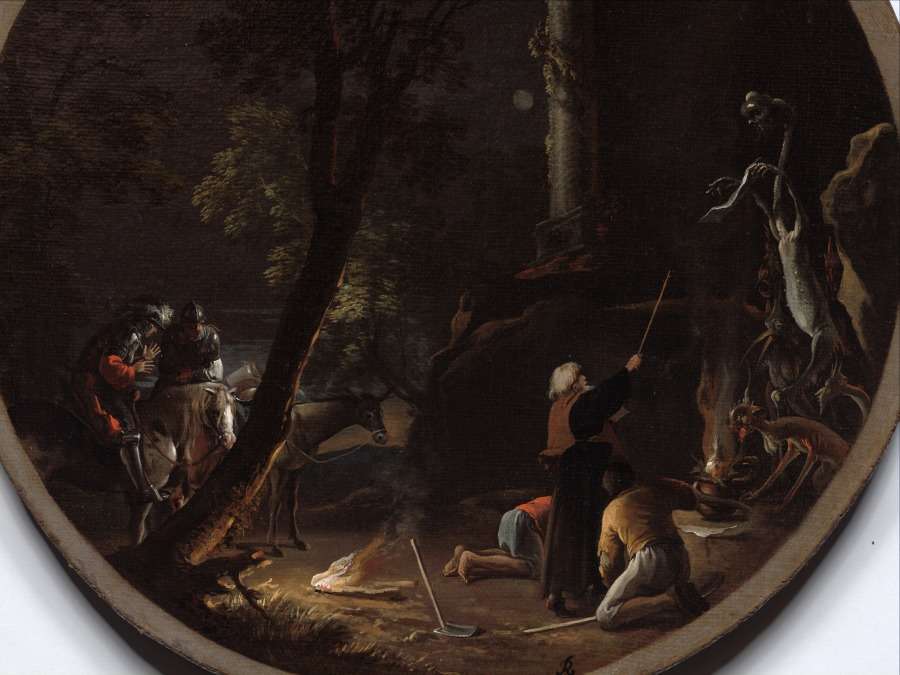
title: Scenes of Witchcraft: Night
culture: Italy, 17th century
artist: Salvator Rosa (Italian, 1615–1673)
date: c. 1645–1649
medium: oil on canvas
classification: Painting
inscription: Signed: "SR [monogram]"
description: In the pitch black of night, two groups of men are gathered in a forest. To the left, travelers apprehensively pause to watch a magician conjure terrifying apparitions. Since the Middle Ages, necromancy, the act of communing with the dead, was associated with male sorcerers. In Rosa's painting, the wizened necromancer who stands tall and resolute directly below a classical column is reminiscent of Moses, a predecessor to Renaissance depictions of sorcerers. Rosa's learned magicians not only invoke associations with philosophers and intellects, but they would have also referred to the artist himself and the intellectual elite with whom he associated in Florence. Just as a powerful magician could conjure strange creatures with his wand, so too could Rosa shape a strange world with his originality, intelligence, and the skillful use of paint and brush.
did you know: The artist chose the painting's shape to reference the foundational role of the circle in practicing magic.